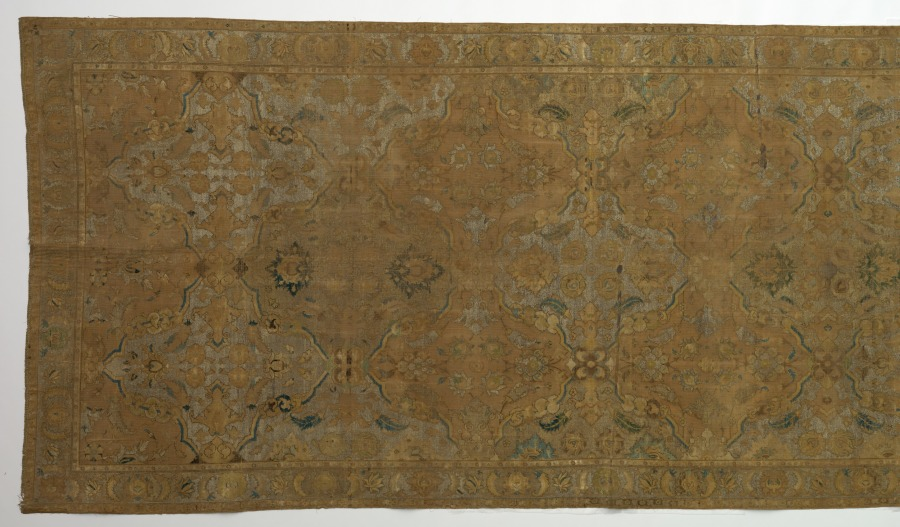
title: Carpet, so-called "Polonaise"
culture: Iran, 17th century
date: 17th century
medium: senna knot: silk, silver and gold filé brocading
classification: Carpet